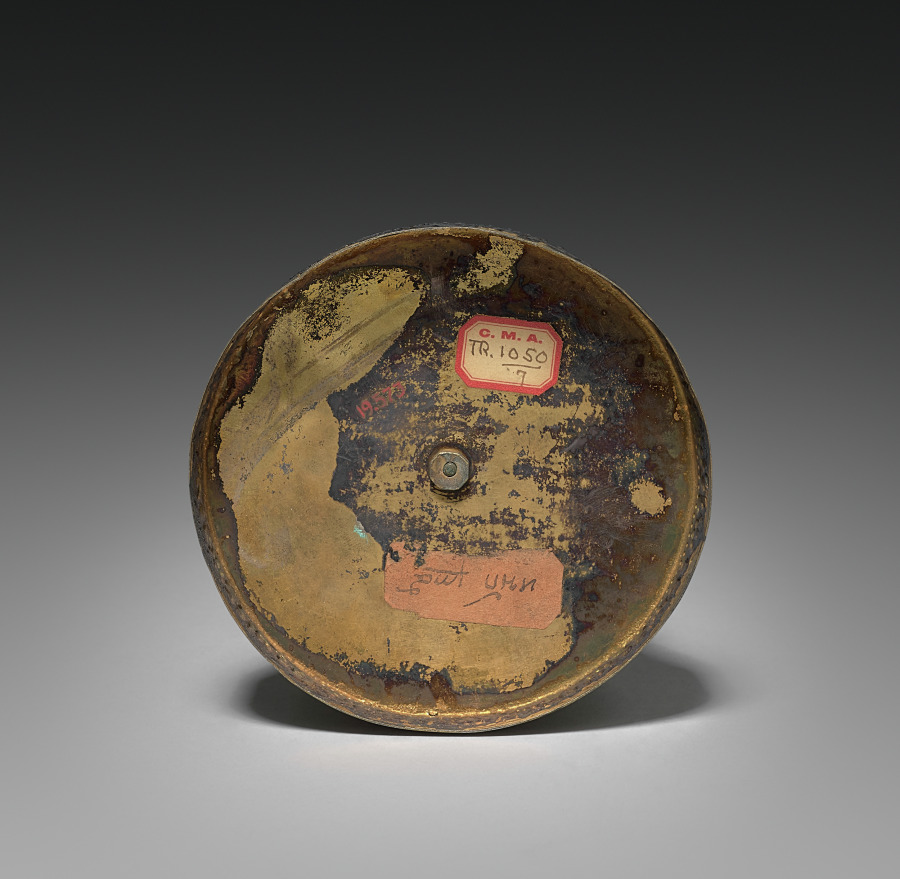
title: Burial Urn (base)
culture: Siam, 19th century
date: 1800s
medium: gold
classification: Metalwork